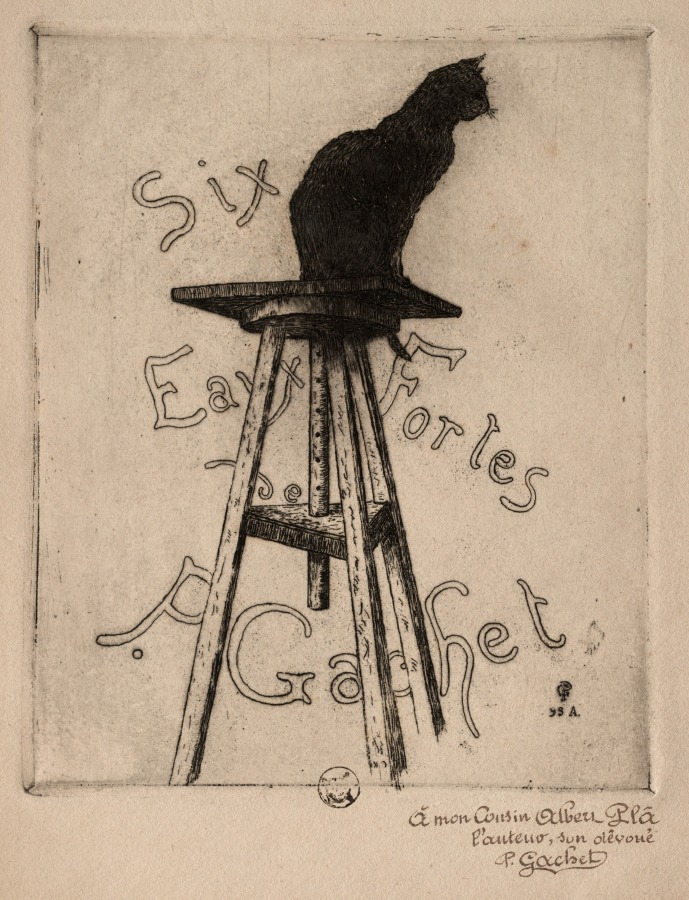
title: Six Etchings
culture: France, 19th century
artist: Paul Gachet (French, 1828–1909)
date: 1895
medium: etching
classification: Print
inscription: annotated lower right margin, in ink: "A mon Cousin Albert Plâ l'auteur son dévoué Paul Gachet"